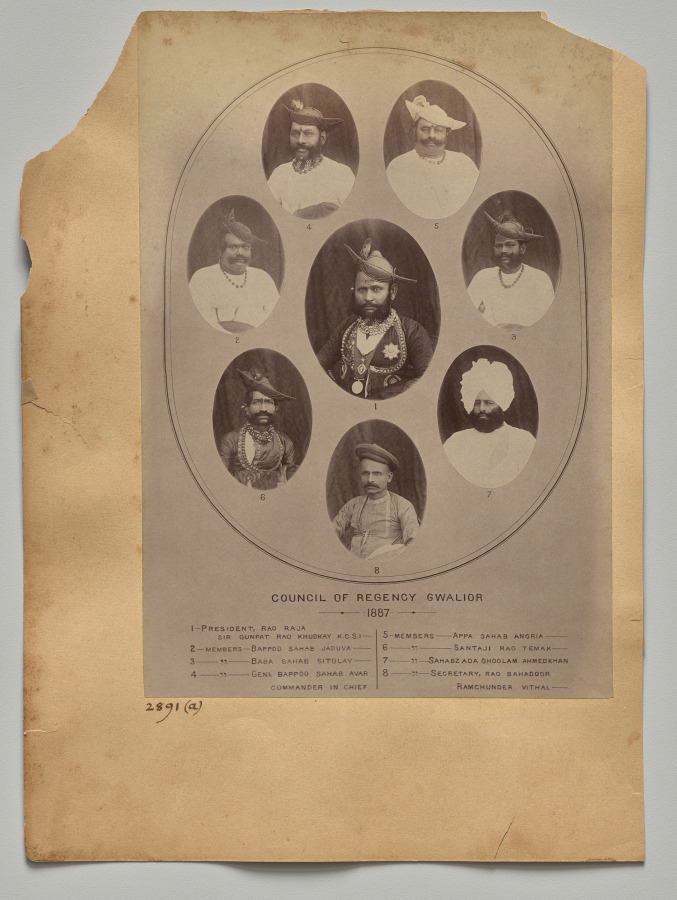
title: Council of Regency, Gwalior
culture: India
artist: Raja Deen Dayal (Indian, 1844–1905)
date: c. 1882–87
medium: albumen print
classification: Photograph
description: These photographs are part of an album, now disassembled, of around 105 photographs taken in India between 1885 and summer 1887 that provide glimpses into the lives of the British colonial elite and royal and upper-class Indians. The museum holds another group of 37 pictures from this album (2016.266), which was probably commissioned by a British civil servant visiting or working in India around 1888 as a personal souvenir of his experiences there.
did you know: Raja Deen Dayal is regarded now, and was considered during his lifetime, to be India’s most important 19th-century photographer.